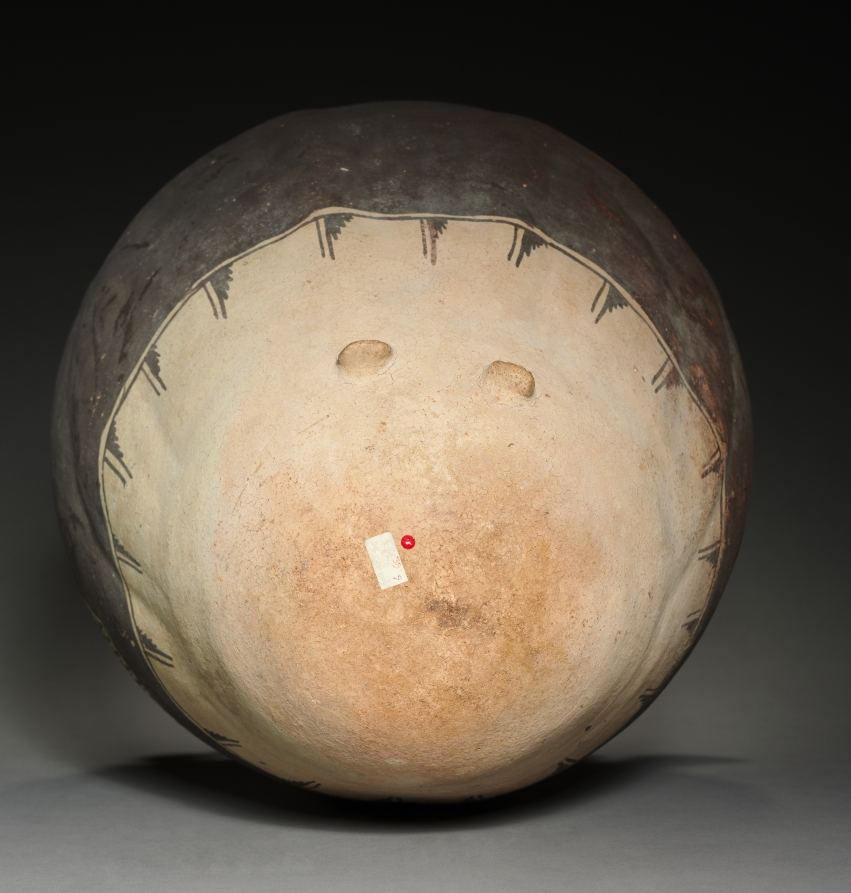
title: Vessel in the Shape of a Figure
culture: Peru, Central Coast, Chancay sytle, 12th-15th century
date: 1000–1460s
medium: earthenware with painted slip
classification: Ceramic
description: This seated figure carries a stag over his shoulders, its antlers now missing and its tongue lolling out in death. That the stag is destined for more than dinner is suggested by the human's pursed lips--perhaps the kiss-like expression of reverence that the later Inka made when approaching a sacred shrine. The animal, then, may be an offering. The two bags painted on the figure's back may be for coca leaves, also very important for rituals. In comparison to earlier ceramics, the Chancay style seems less fine both artistically and technically. yet as this vessel proves, the best Chancay ceramics have appealing charm, in part because of their bold brown-on-white color scheme.